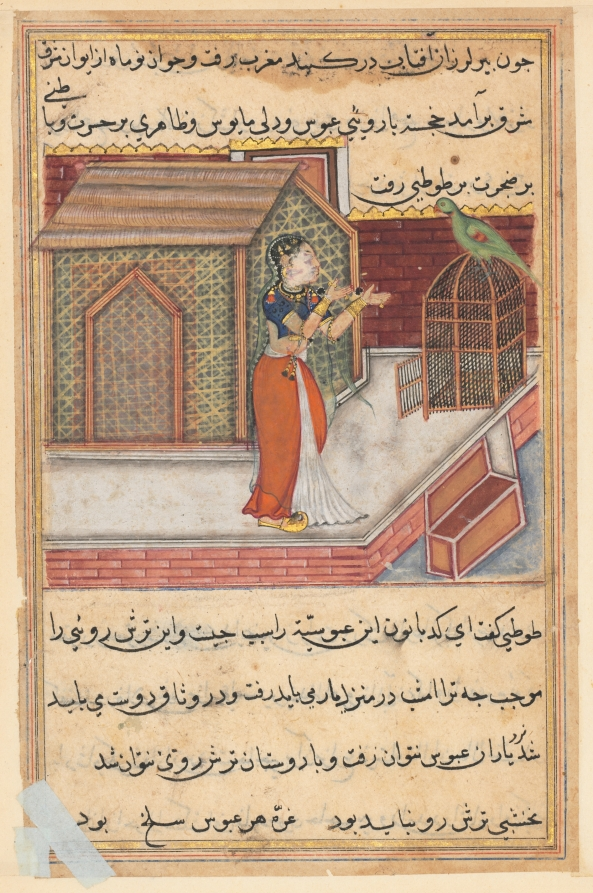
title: The parrot addresses Khujasta at the beginning of the forty-ninth night, from a Tuti-nama (Tales of a Parrot): Forty-Ninth Night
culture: Mughal India, court of Akbar (reigned 1556–1605)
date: c. 1560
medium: gum tempera, ink, and gold on paper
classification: Painting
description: On the forty-ninth of fifty-two nights, Tuti the wise, talking parrot tells Khujasta a moralizing story about three brothers, two of whom aged prematurely, while the third remained young. The story lasts until sunrise, and Khujasta is unable to leave to visit her lover.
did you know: The original underdrawing is visible where the paint has flaked from Khujasta’s face.